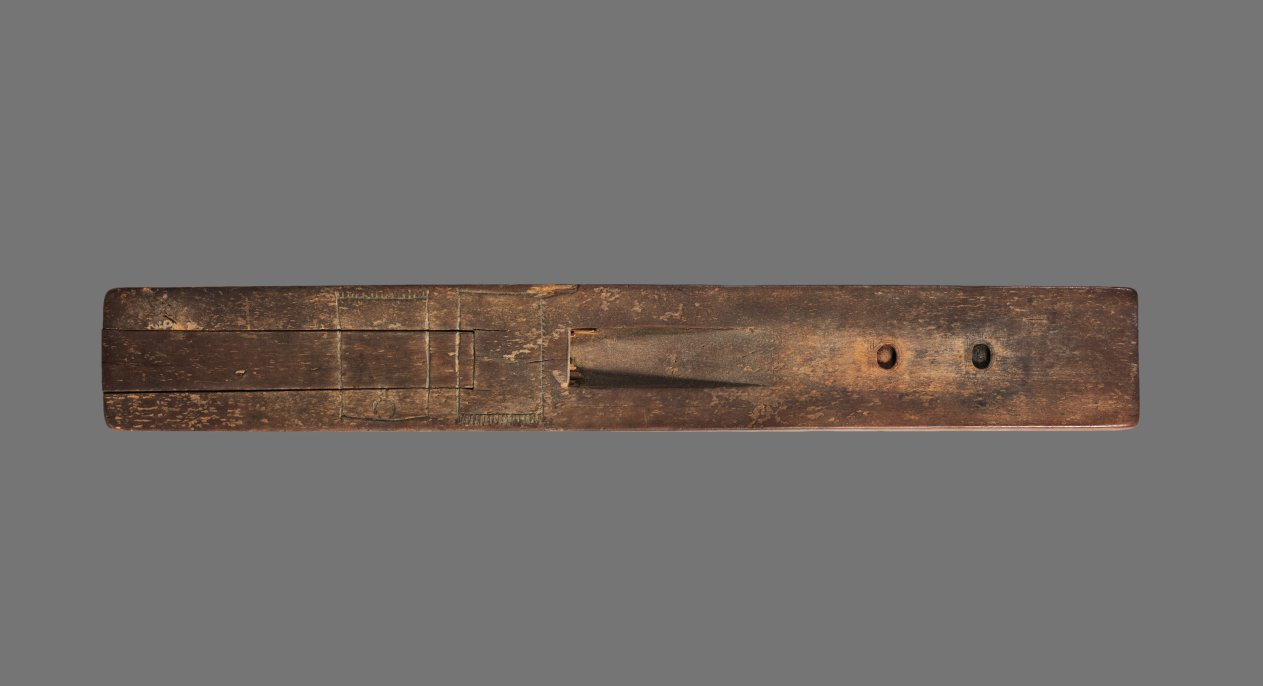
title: Scribe's Palette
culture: Egypt, New Kingdom (1540–1069 BCE), Dynasties 18–19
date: 1540–1186 BCE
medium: wood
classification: Implements